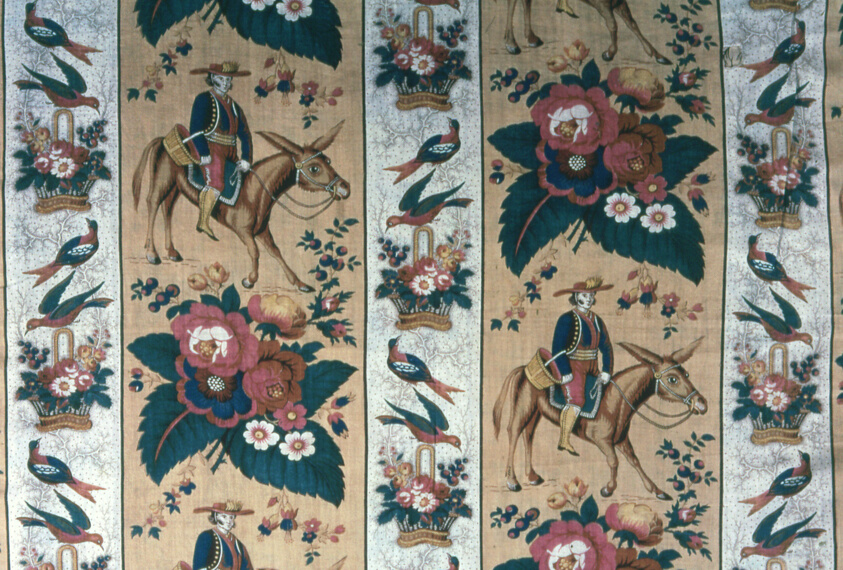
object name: Textile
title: Panel (Furnishing Fabric)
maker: England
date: c. 1850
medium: Cotton, plain weave; roller printed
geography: England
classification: textile; weaving - printed; weaving; furnishing textile